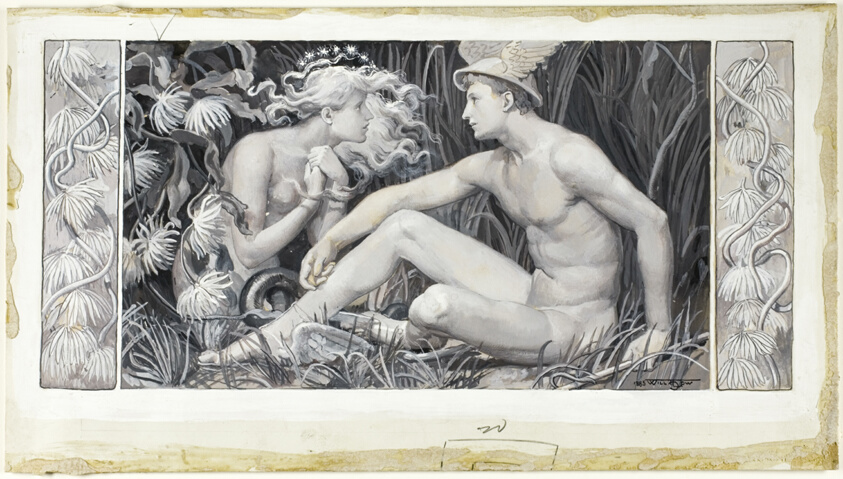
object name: Drawing and Watercolor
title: The Words She Spake Came as Through Bubbling Honey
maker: Will Hicock Low (American, 1853-1932)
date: 1885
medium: Black, gray and white gouache, with traces of black chalk, on cream wove card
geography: United States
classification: drawings (visual works); prints and drawing